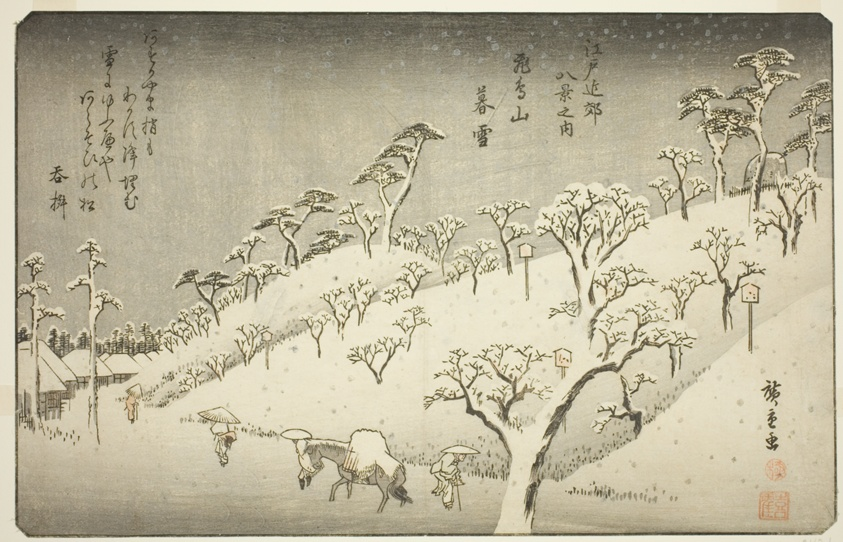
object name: Print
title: Lingering Snow at Asukayama (Asukayama no bosetsu), from the series "Eight Views in the Environs of Edo (Edo kinko hakkei no uchi)"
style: Japanese (culture or style)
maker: Utagawa Hiroshige (Japanese, 1797-1858)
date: 1837-38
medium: Color woodblock print; ōban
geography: Japan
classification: woodblock print; print; asian art